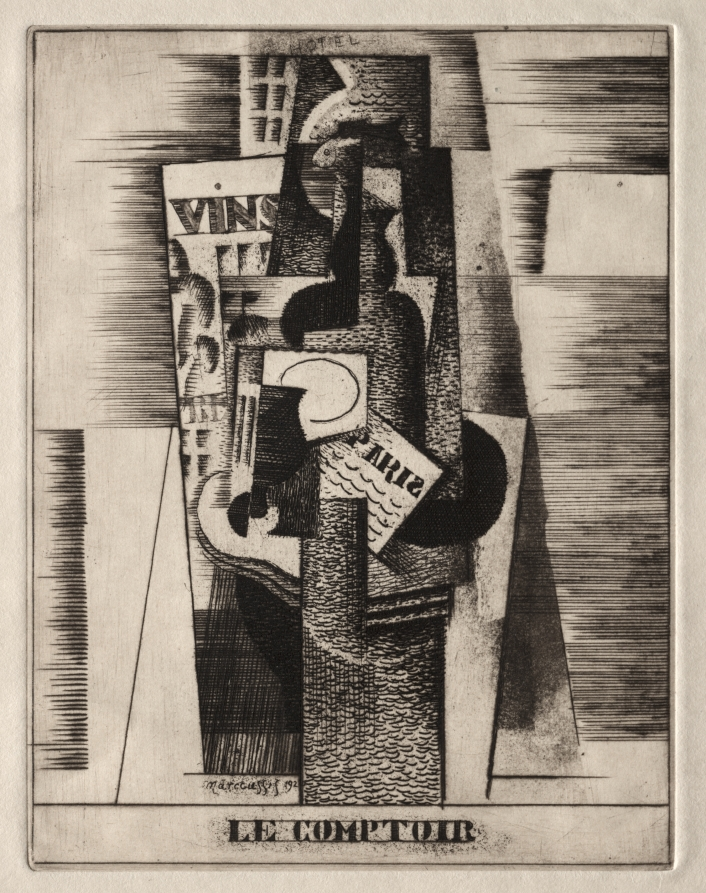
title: The Bar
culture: France, 20th century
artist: Louis Marcoussis (French, 1883–1941)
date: 1920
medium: aquatint, etching and drypoint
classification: Print